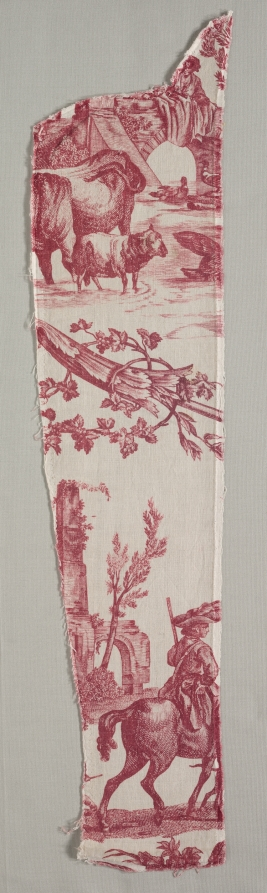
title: Fragments of Copperplate Printed Cotton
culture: France, 18th century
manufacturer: firm of Christophe Philippe Oberkampf (French, 1738–1815)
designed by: Jean-Baptiste Marie Hüet (French, 1745–1811)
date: c. 1789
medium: copperplate printed linen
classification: Textile